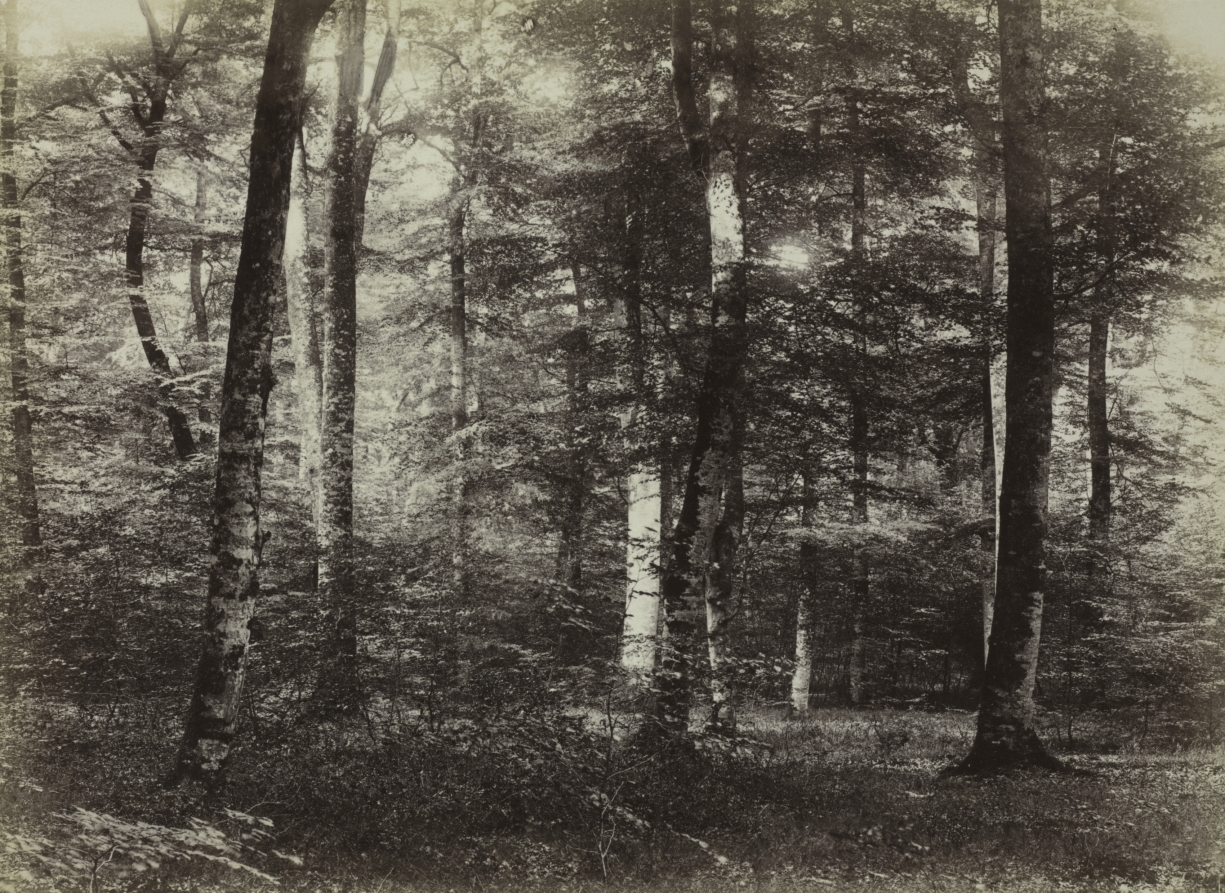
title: Untitled (The Forest of Fontainebleau)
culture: France, 19th century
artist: Constant Alexandre Famin (French, 1827–1888)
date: c. 1874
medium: albumen print, coated, from wet collodion negative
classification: Photograph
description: Little is known about this gifted photographer who produced photographic studies of the landscape and rural motifs during the 1860s and 1870s. This image depicts a lovely wooded landscape scene flooded with sparkling sunlight and rich shadows. Of all the landscape photographers active in the 1870s, Famin produced the closest equivalent of impressionism in his work.